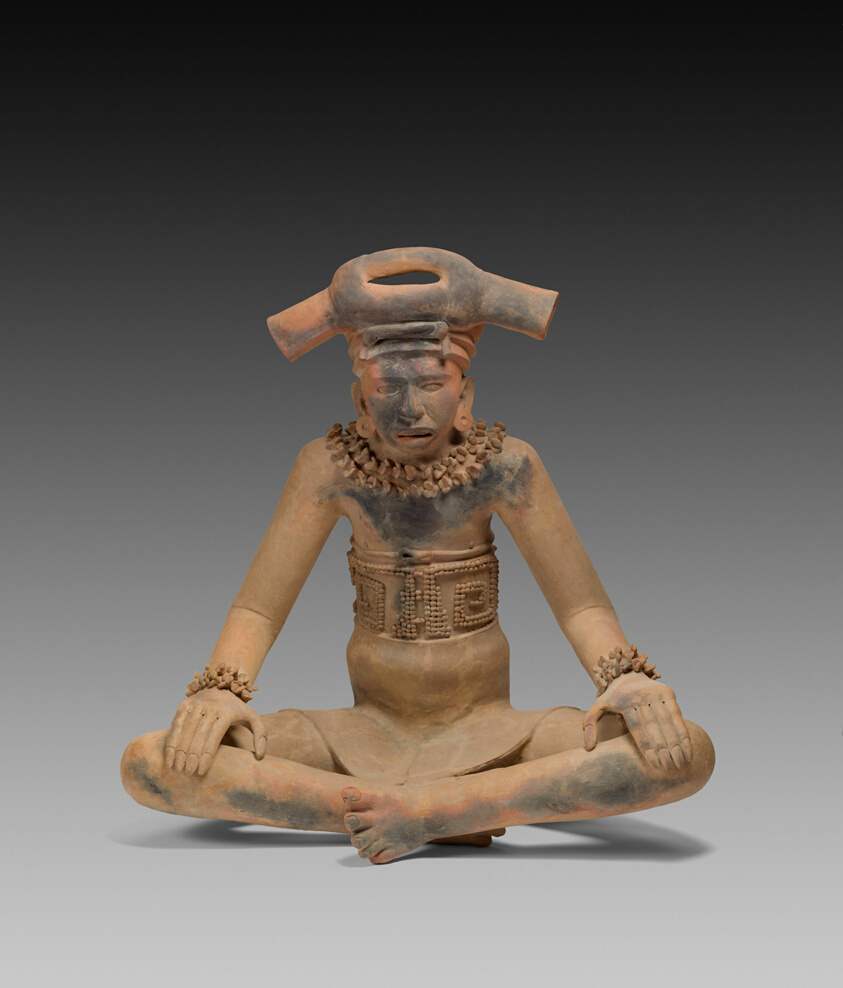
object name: Sculpture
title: Figure of a Seated Leader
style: totonac, early classic, classic, mesoamerican, Pre-Columbian, americas, remojadas, classic veracruz, Arts of the Americas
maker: Totonac, Remojadas; Veracruz, south-central Gulf Coast, Mexico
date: 300–600 CE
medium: Terracotta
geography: Remojadas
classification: ceramics; earthenware; sculpture; art of the americas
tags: people, textile pattern, costume, headdresses, rulership, rulers (people)